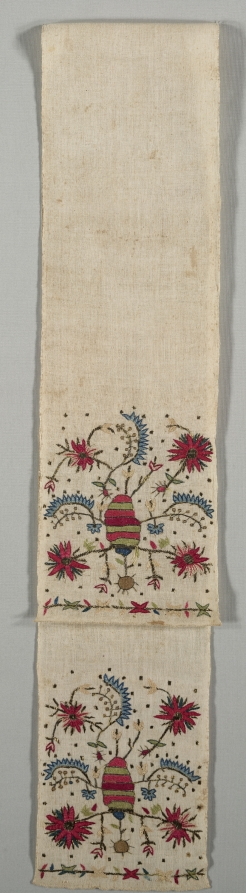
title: Embroidered Sash ("Uckur")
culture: Turkey or Greece, Sporades Islands, Skyros ?, 19th century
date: 19th century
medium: embroidery: silk thread and brass strip hooked through and pressed flat on linen tabby ground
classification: Embroidery